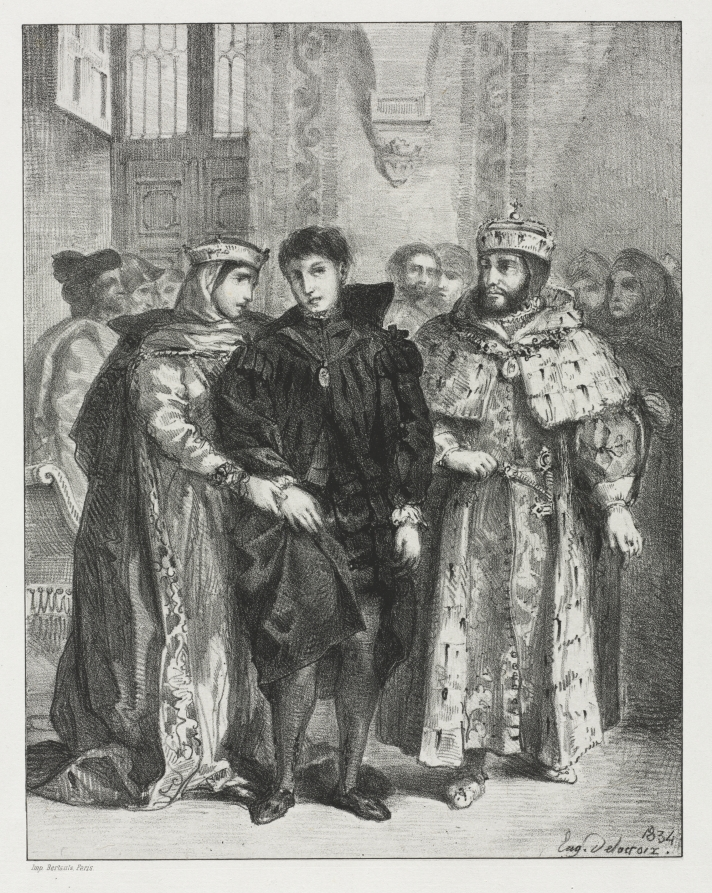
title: Hamlet: The Queen Endeavors to Console Hamlet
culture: France, 19th century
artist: Eugène Delacroix (French, 1798–1863)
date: 1834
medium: lithograph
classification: Print